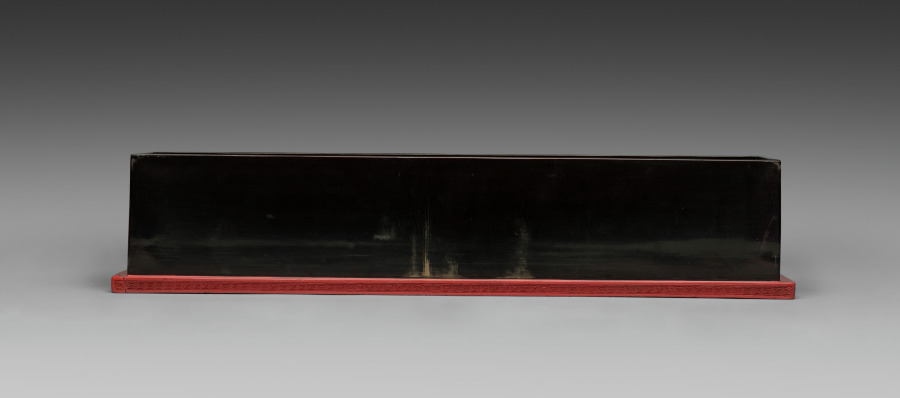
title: Base for a Carved Lacquer Scroll Box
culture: China, Qing dynasty (1644–1911), Qianlong reign (1736–95)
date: 1736–95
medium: cinnabar carved lacquer on wood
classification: Lacquer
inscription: 心寫治平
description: The elaborate design, superior craftsmanship, and inscription carved into the red cinnabar lacquer proclaim the imperial pedigree of this scroll box. On either end appears a five-clawed dragon, a design reserved only for an emperor. More dragons twist and wind through swirling clouds and waves along the length of the box’s sides and top. The carving is intricate and vigorous, while the design is controlled and regular. This box originally housed the handscroll, CMA 1969.31, private portraits of the Emperor Qianlong, his empress, and 11 other favorites among his presumed 40 or more wives during his 60-year reign.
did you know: This is the original box for the handscroll Portraits of the Qianlong Emperor and His Twelve Consorts, CMA 1969.31.